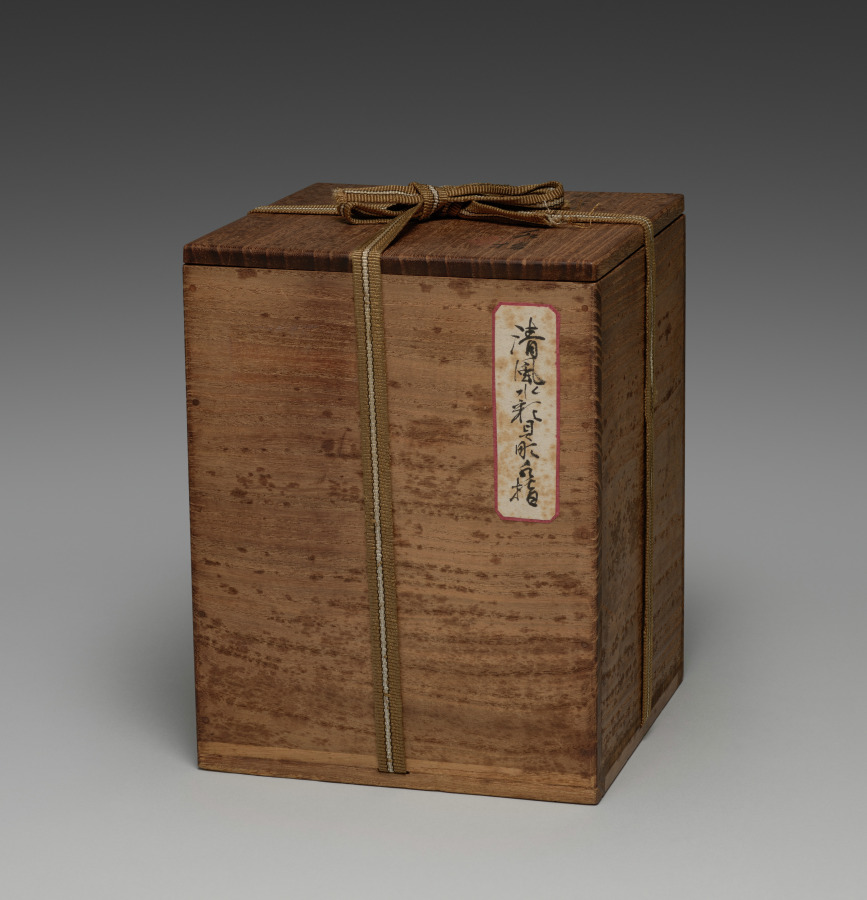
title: Water Container with Shell and Seaweed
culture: Japan, Meiji period (1868–1912) or Taishō period (1912–26)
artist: Seifū Yohei IV (Japanese, 1872–1951)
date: 1914–46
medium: Porcelain with underglaze blue, blue glaze and molded design and lacquered wood lid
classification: Ceramic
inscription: 清風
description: Yohei IV chose an aquatic theme for this mizusashi. He applied clay to the surface and molded the shape of a large conch on one side and, on the other, a clam and a scallop. The finer details he incised into the surface of his low-relief shapes. He then painted seaweed as though it were coming out from behind the sea creatures, and he further set off the animals using a masking technique with a gradated blue surround. Finally, he applied a translucent blue glaze, identified on the box as mizusai, over the entire body of the vessel. The resulting effect is that one imagines having descended through the water to the ocean floor.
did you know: A mizusashi, water container, is an essential utensil for a tea ceremony.